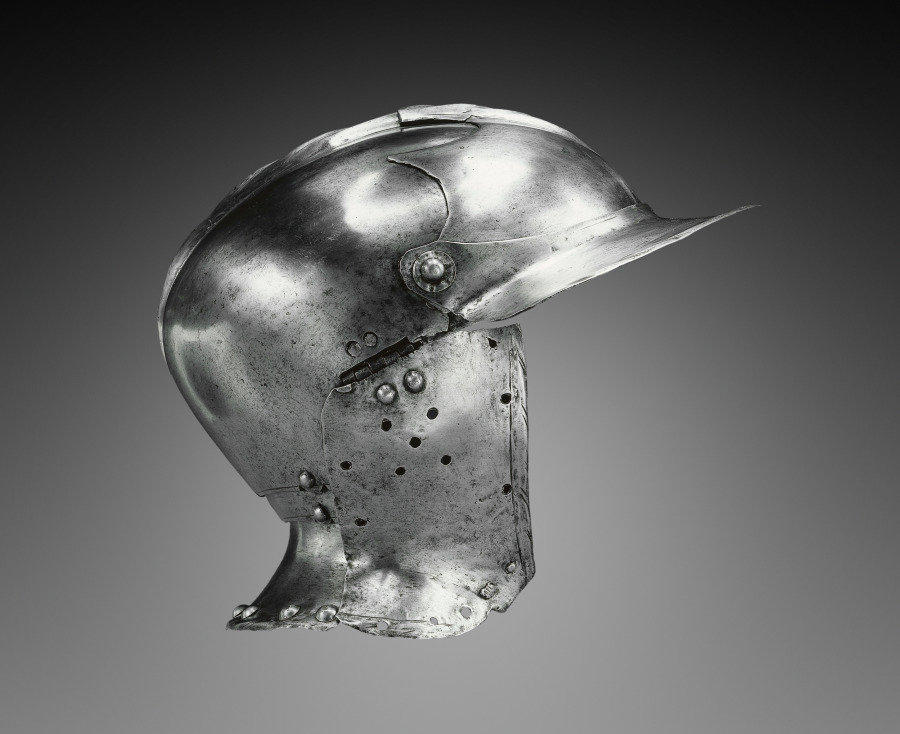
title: Burgonet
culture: Italy, 16th century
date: c. 1540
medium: steel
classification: Arms and Armor